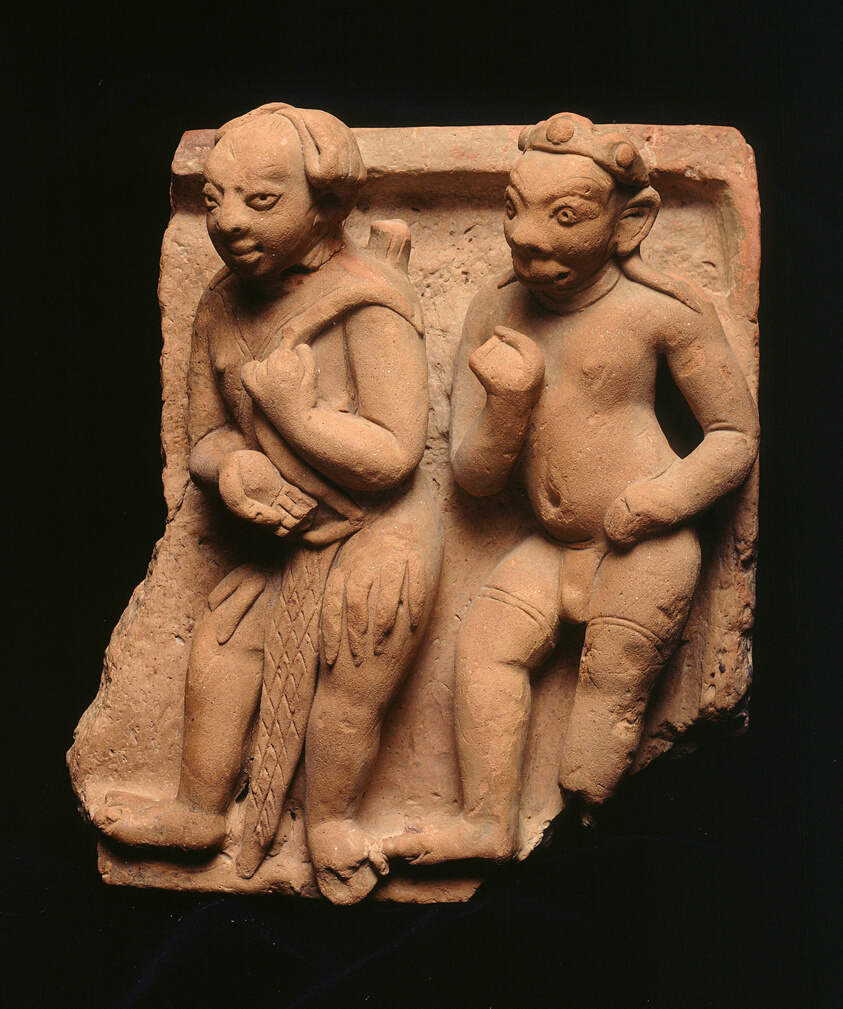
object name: Sculpture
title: Rama and Sugriva set out to find Valin?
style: South Asian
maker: India; Uttar Pradesh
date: Gupta period, c. 5th century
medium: Terracotta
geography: Uttar Pradesh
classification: earthenware; ceramics; sculpture; asian art